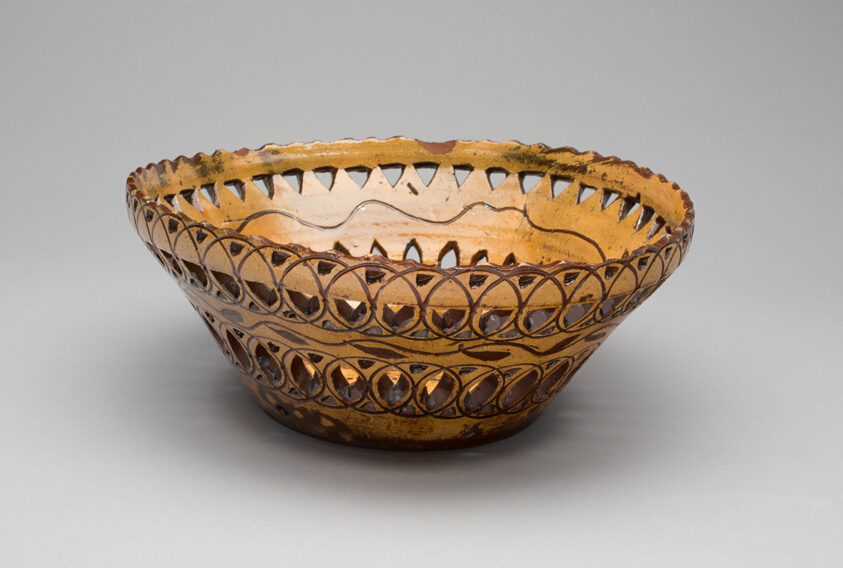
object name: Decorative Arts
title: Bowl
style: Folk Art, pennsylvania german, american colonial, americas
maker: Artist unknown (American, active 19th century); Pennsylvania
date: 1814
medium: Earthenware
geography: Pennsylvania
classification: dish (vessel); earthenware; american decorative arts; american arts; ceramics; decorative arts